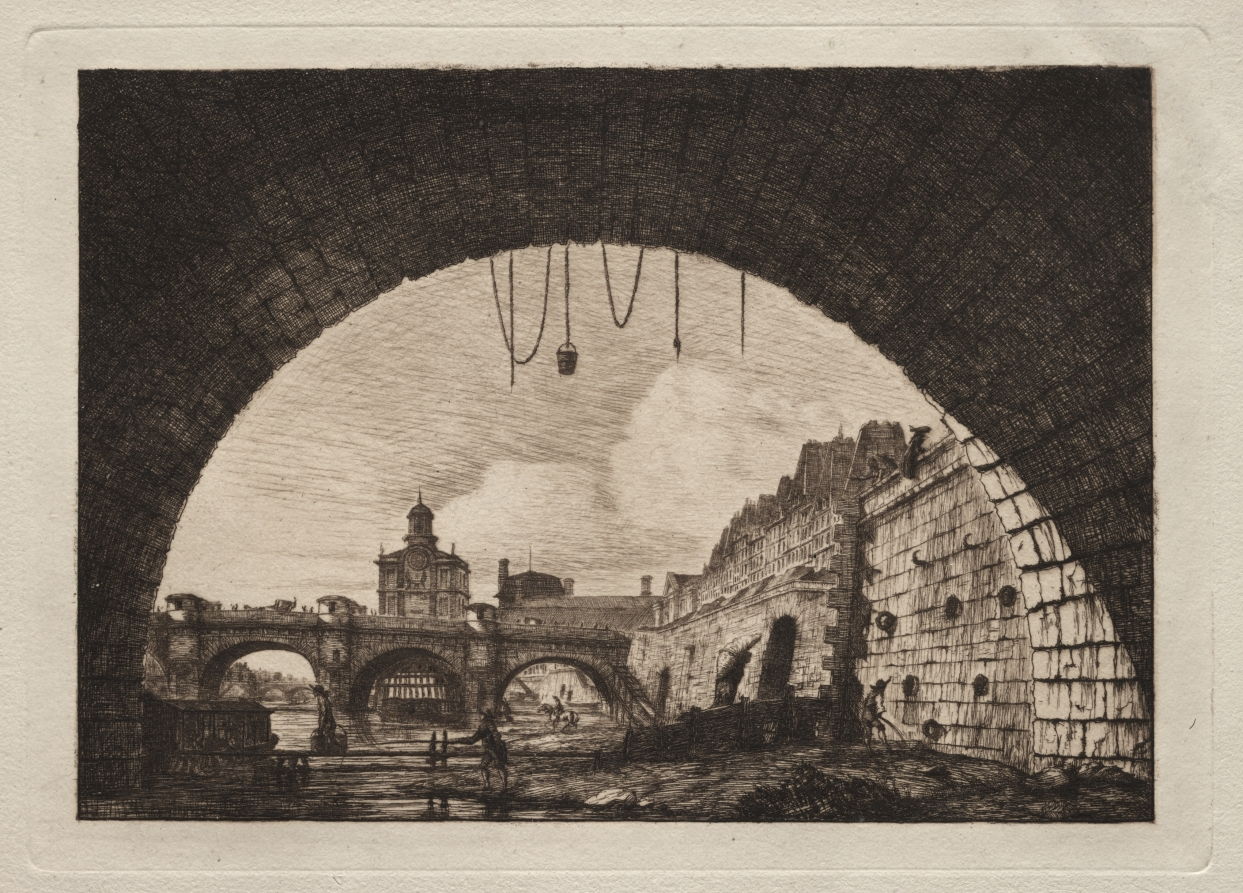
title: The New Bridge and the Samaritaine seen from under the First Arch of the Exchange Bridge, Paris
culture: France, 19th century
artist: Charles Meryon (French, 1821–1868)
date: 1855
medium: etching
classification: Print